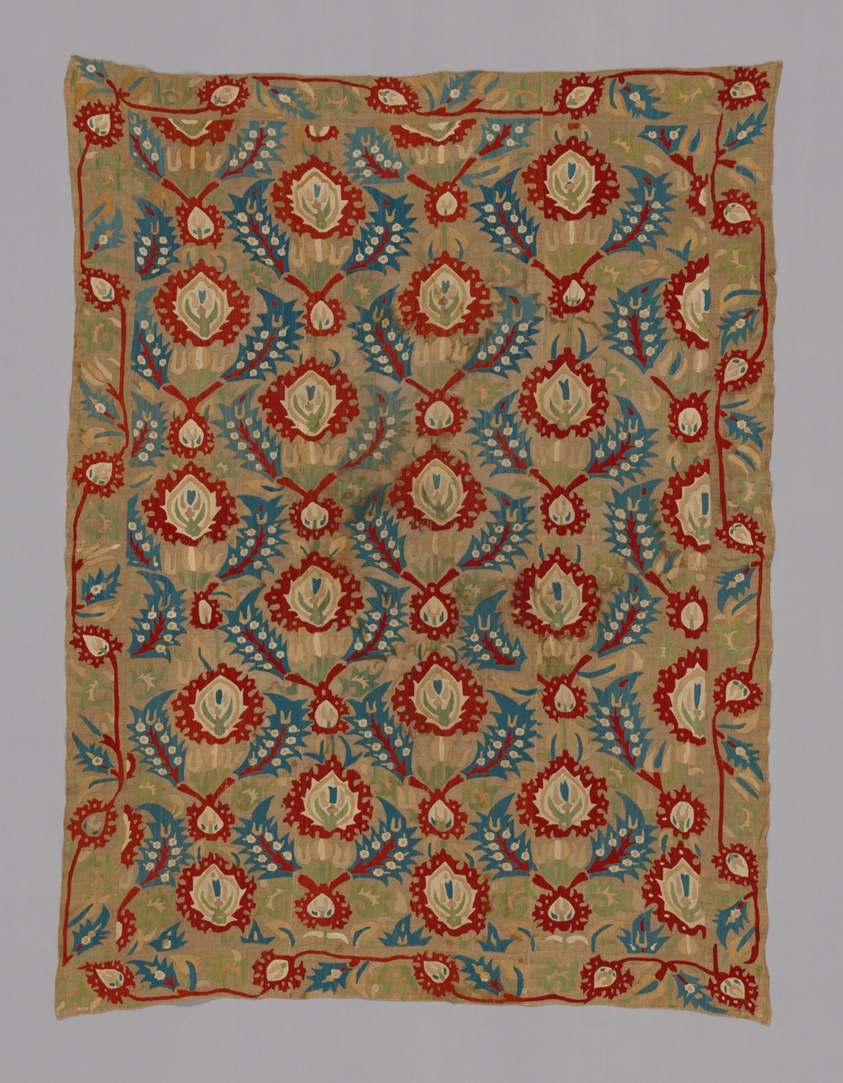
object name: Textile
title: Cover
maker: Turkey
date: 1675/1725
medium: embroidered linen. Three bands ogival motif and flowers, palmette border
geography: Turkey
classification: textile; needlework (visual works); weaving